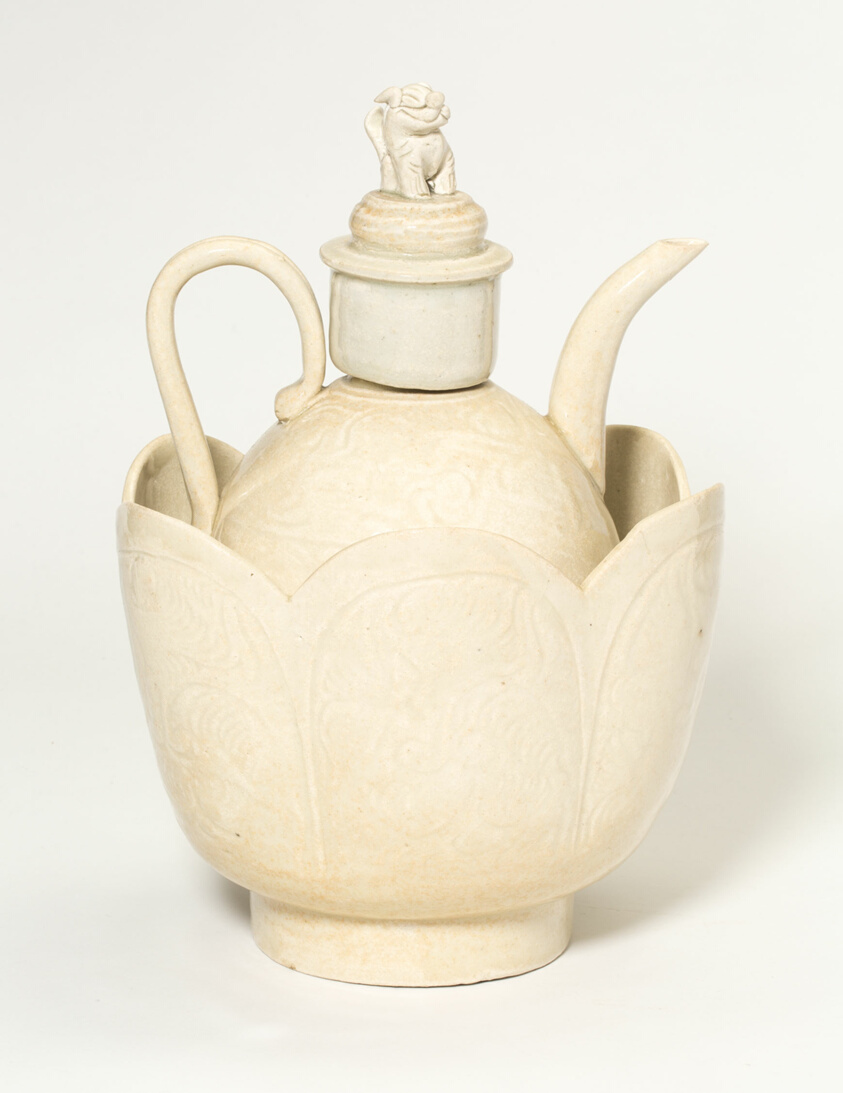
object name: Vessel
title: Wine Ewer and Warming Bowl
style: Chinese (culture or style)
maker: China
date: Northern Song dynasty (960–1127)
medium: Qingbai ware; porcelain with underglaze carved and incised decoration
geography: China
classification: vessel for serving drinks; ewer (vessel); porcelain; ceramics; asian art; vessel